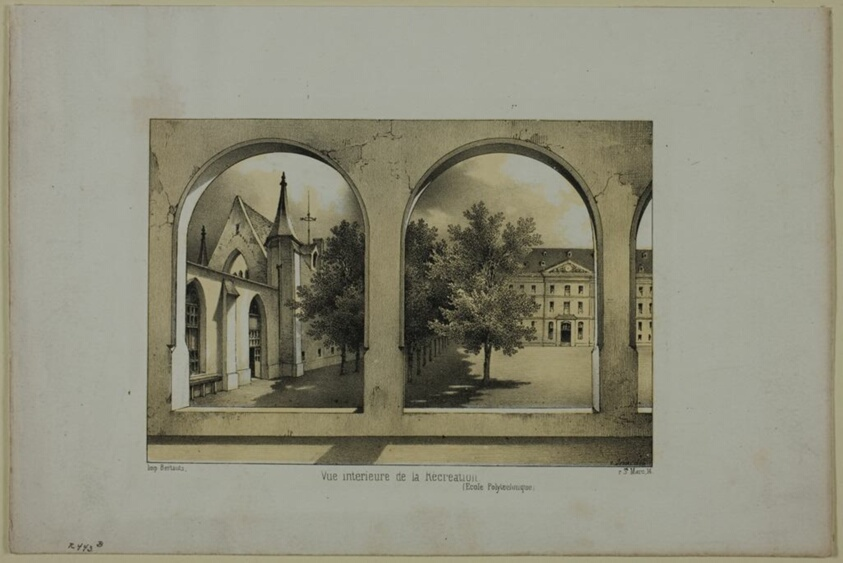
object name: Print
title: Interior View of the Recreation Ground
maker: Charles-Nicolas Lemercier (French, 1797-1859)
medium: Tinted (two-stone) lithograph on white wove paper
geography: France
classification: lithograph; prints and drawing; print